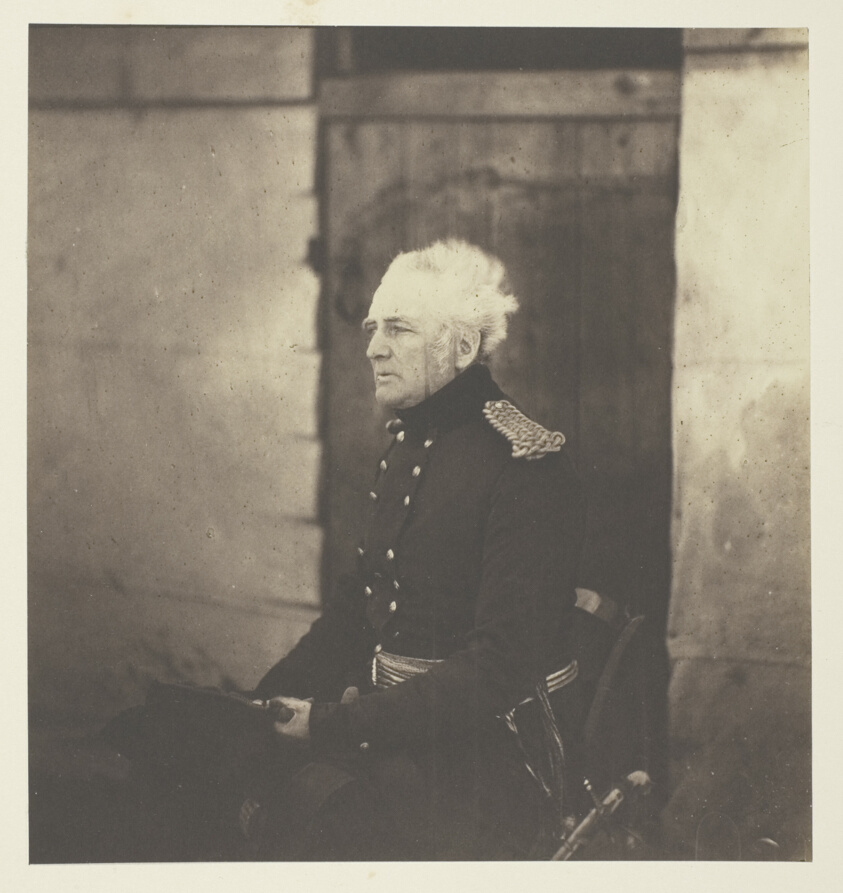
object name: Photograph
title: Lieutenant General Sir George Brown, G.C.B.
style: 19th century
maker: Roger Fenton (English, 1819–1869)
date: 1855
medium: Salted paper print, plate 29 from the album "Photographs Taken in the Crimea" (1856)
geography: England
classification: salted paper print; photographic process; photography; photograph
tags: Collected by Hugh Edwards, Crimea 1856